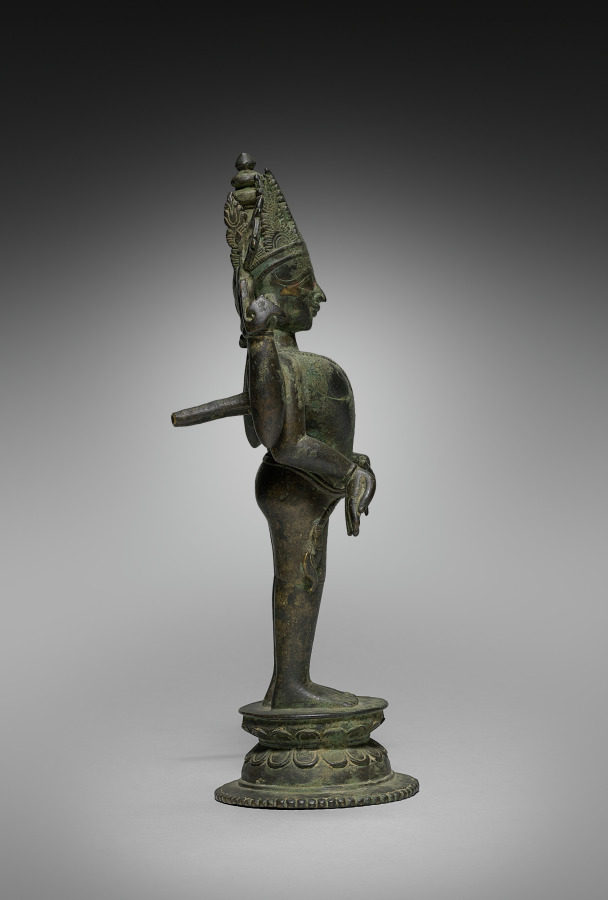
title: Vasudeva - Vishnu - Narayana as Shridhara, one of the 24 forms of Vishnu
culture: West India, 16th-17th century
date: 1500s–1600s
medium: brass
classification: Sculpture